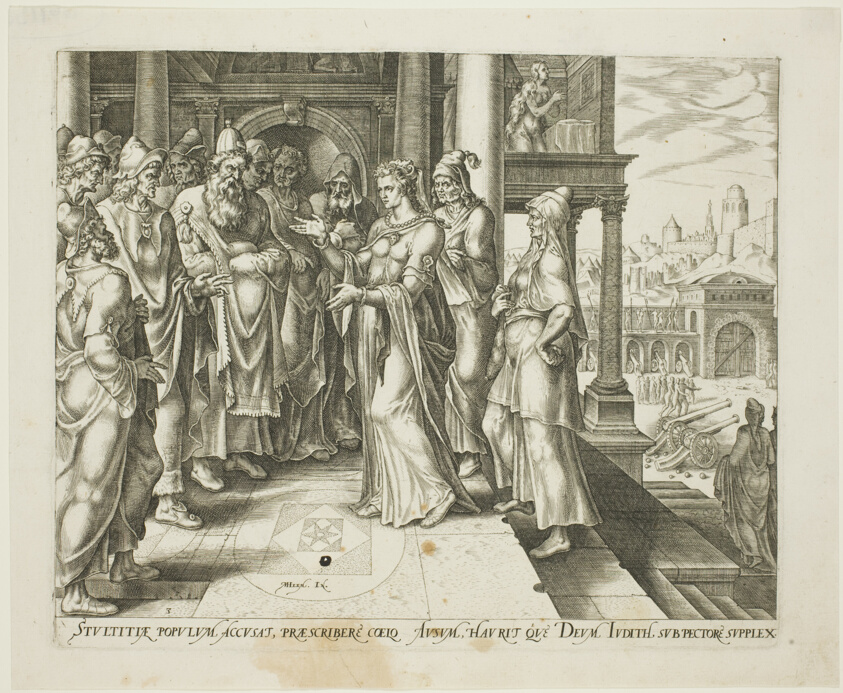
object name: Print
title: Judith Addressing the Elders of Bethulia, plate three from The Story of Judith and Holofernes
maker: Philip Galle (Netherlandish, 1537-1612); after Maarten van Heemskerck (Dutch, 1498-1574)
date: 1564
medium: Engraving in black on ivory laid paper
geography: Netherlands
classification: engraving; paper; print; prints and drawing